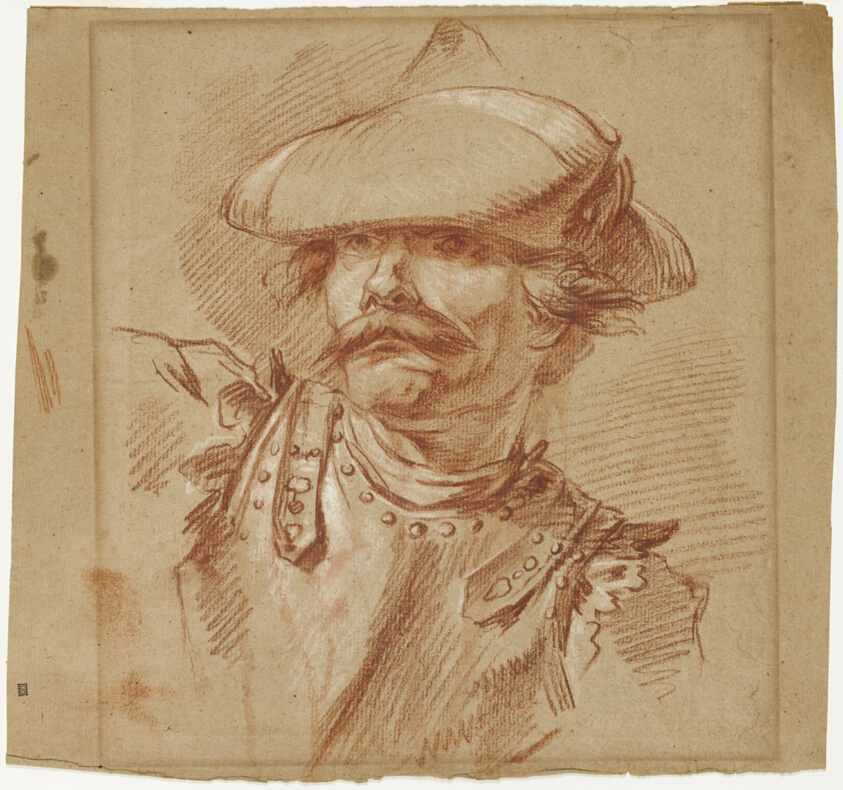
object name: Drawing and Watercolor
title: Head of a Soldier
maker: Attributed to Charles Parrocel; French, 1688-1752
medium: Red chalk heightened with white chalk on tan laid paper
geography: France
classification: drawings (visual works); prints and drawing